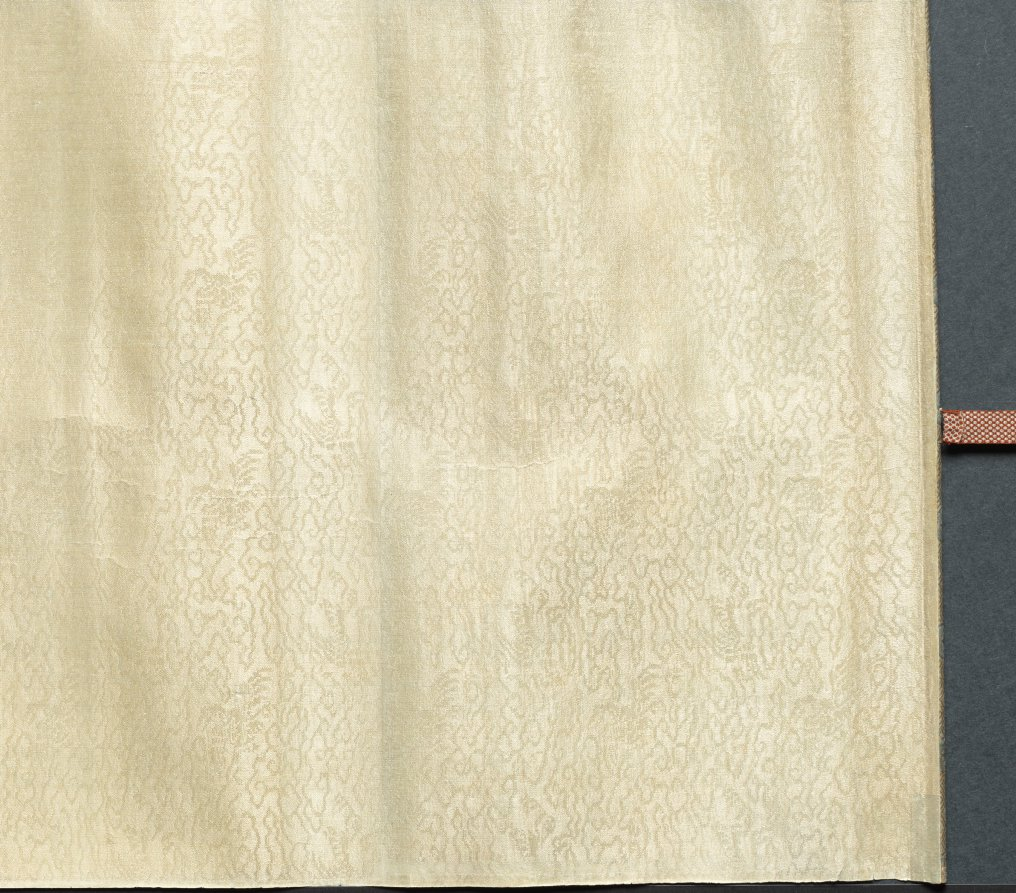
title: Fisherman's Joy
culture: China, Ming dynasty (1368–1644)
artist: Qian Gu (Chinese, 1508–c. 1578)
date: 1572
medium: Handscroll; ink and light color on paper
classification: Painting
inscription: Artist's inscription, signature, and seal: On the autumn day of the jen-shen year [1572], P'eng-ch'eng, Ch'ien Ku painted [this]. [seal] Hsüan-ch'ing shih. 2 colophons, both dated 1689, and 5 additional seals of Yün Shou-p'ing (1633-1690).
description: This painting has a scene showing two small crafts, each manned by two fishermen, practicing a traditional fishing method. In one of them, a man uses a bamboo pole to direct the movements of a cormorant bird sent into the water. Cormorant fishing, witnessed in some areas of the lower Yangzi River, appears in Zhe school paintings. Qian Gu may have borrowed these narrative figure scenes from Zhe school paintings, while his vantage point, brushwork, and soft tones align with the Wu school style. Scenes of fishermen appealed to urban and educated audiences who idealized the self-sufficient independence of fisherfolk.